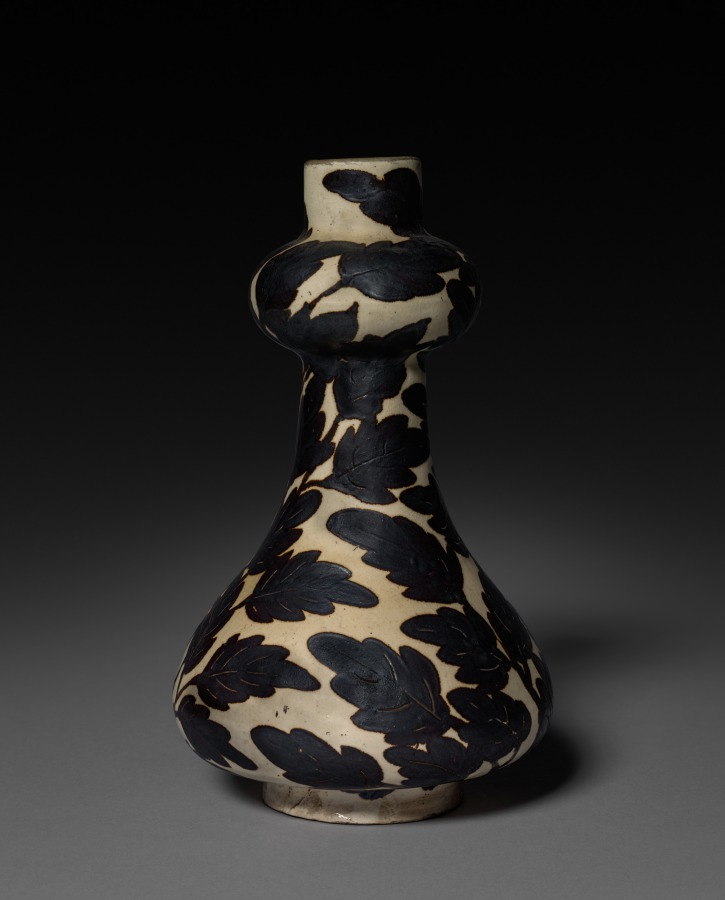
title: Gourd-shaped Vase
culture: China, Ming dynasty (1368–1644)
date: 1368–1644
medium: porcelain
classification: Ceramic